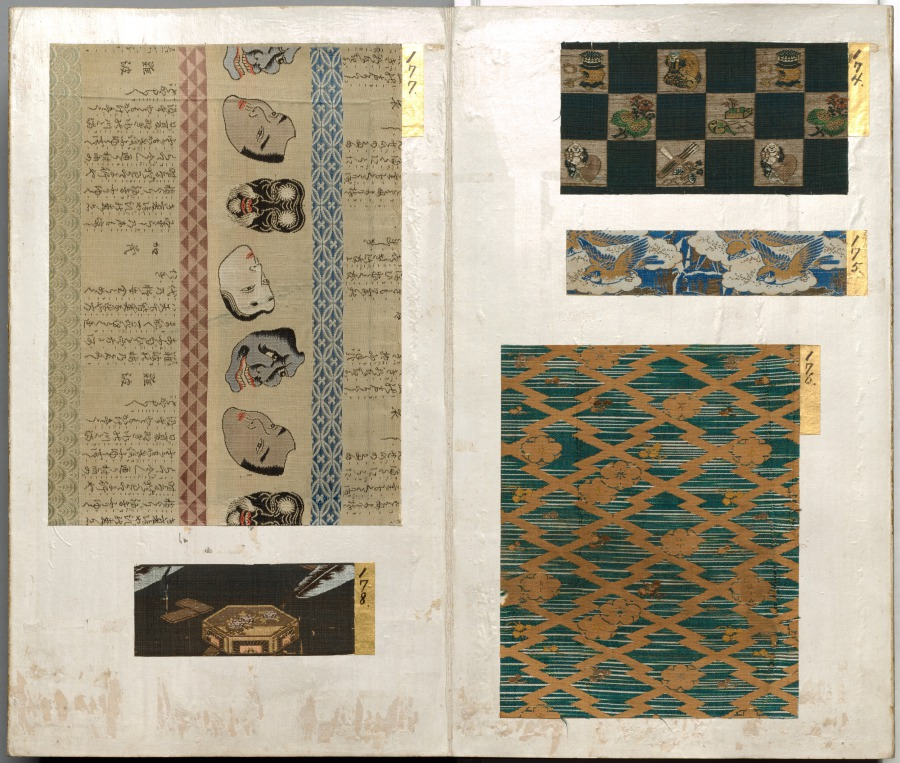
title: Album of Textile Samples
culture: Japan, Edo period (1615–1868)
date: 1600s-1700s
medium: silk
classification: Textile